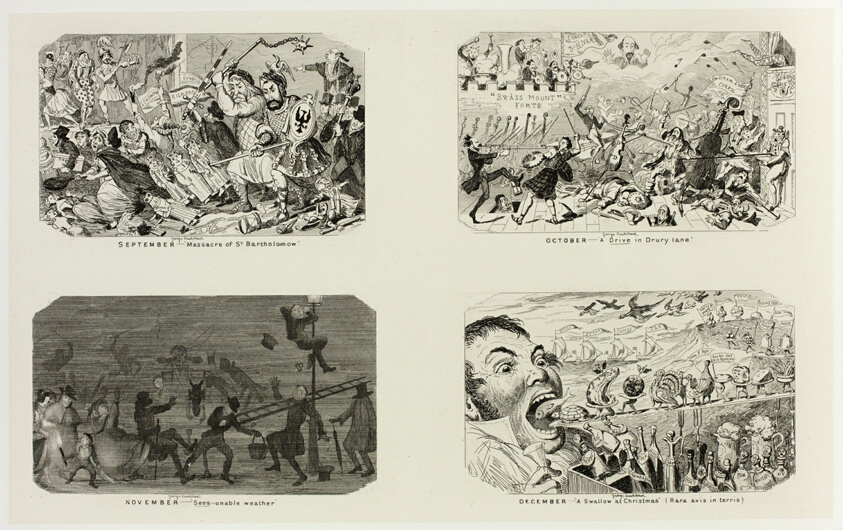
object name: Print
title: September - "Massacre of St. Bartholomew" from George Cruikshank's Steel Etchings to The Comic Almanacks: 1835-1853 (top left)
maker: George Cruikshank (English, 1792-1878); published by Pickering & Chatto (English, 19th century)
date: 1841, printed c. 1880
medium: Four steel etchings in black on cream India paper, laid down on off-white card (chine collé)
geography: England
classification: etching; paper; print; prints and drawing